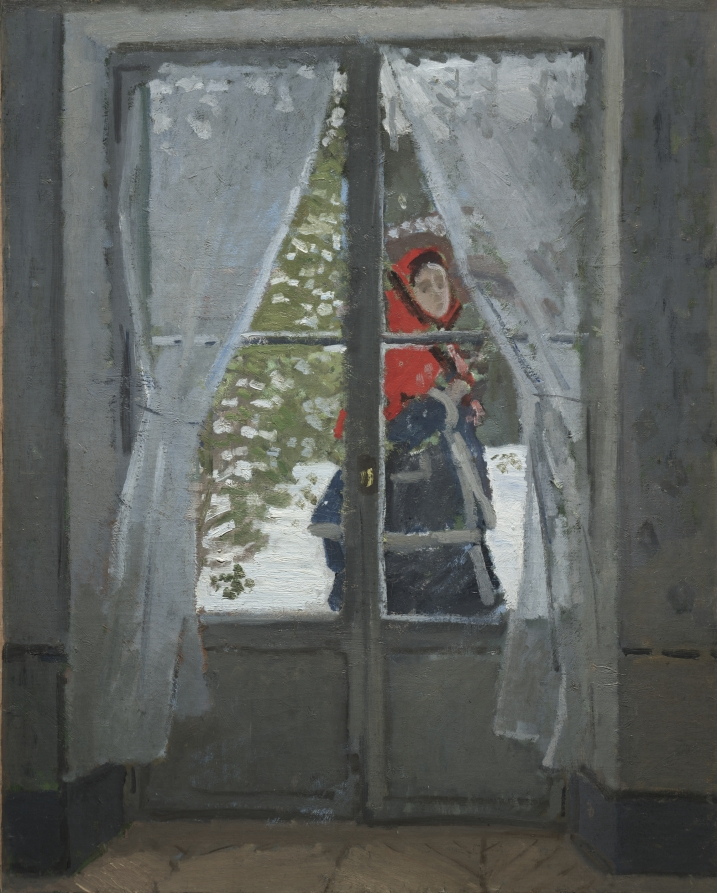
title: The Red Kerchief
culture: France, 19th century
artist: Claude Monet (French, 1840–1926)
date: c. 1868–73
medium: oil on fabric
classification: Painting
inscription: Not signed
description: This painting depicts Monet's first wife, Camille, outside on a snowy day passing by the French doors of their home at Argenteuil. Her face is rendered in a radically bold Impressionist technique of mere daubs of paint quickly applied, just as the snow and trees are defined by broad, broken strokes of pure white and green.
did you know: Madame Monet’s red cape draws the viewer’s attention beyond the glass of the French doors capturing her glance, a brief moment frozen in time. This painting was very special to Monet and he kept it with him for his entire life.